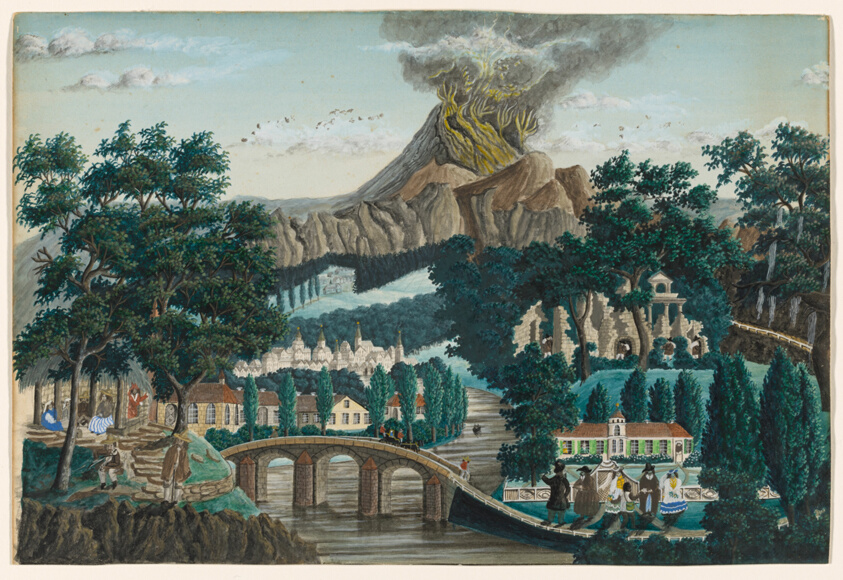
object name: Drawing and Watercolor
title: Landscape with Erupting Volcano, Bridge and Wedding Party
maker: Ernst Damitz (American, born Germany, 1805-1883)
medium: Watercolor over graphite on ivory wove paper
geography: United States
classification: paper; watercolor; prints and drawing